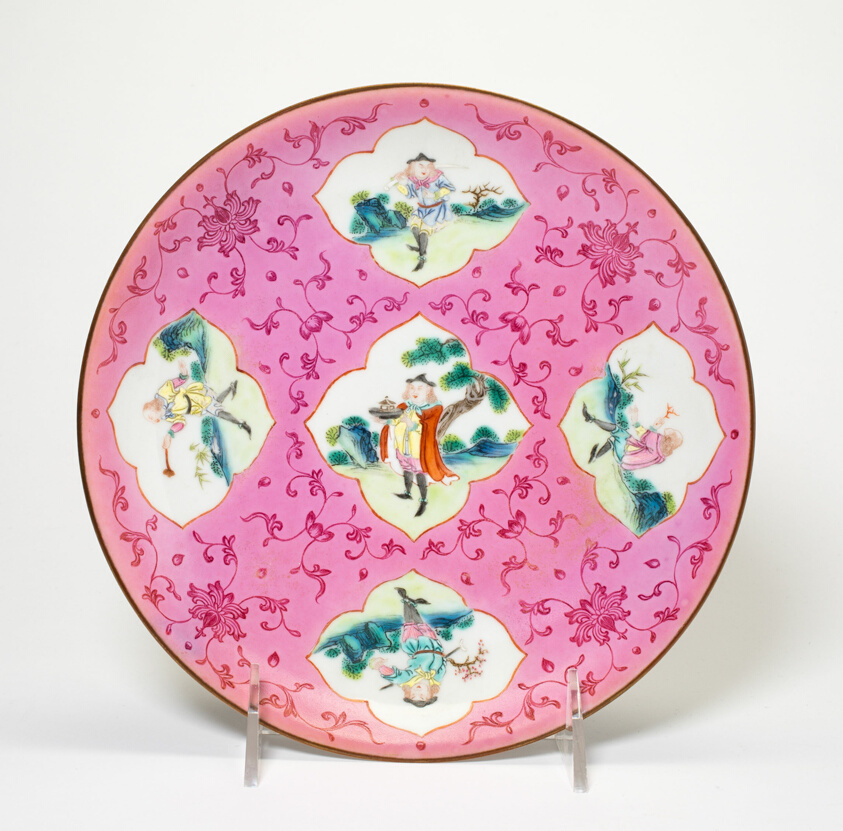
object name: Vessel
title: Dish with Five European Figures and Stylized Floral Scrolls and Five Bats on Reverse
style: Chinese (culture or style)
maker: China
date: Qing dynasty (1644–1911), Qianlong reign mark and period (1736–1795)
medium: Porcelain painted in overglaze enamels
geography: China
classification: dish (vessel); porcelain; asian art; ceramics; vessel